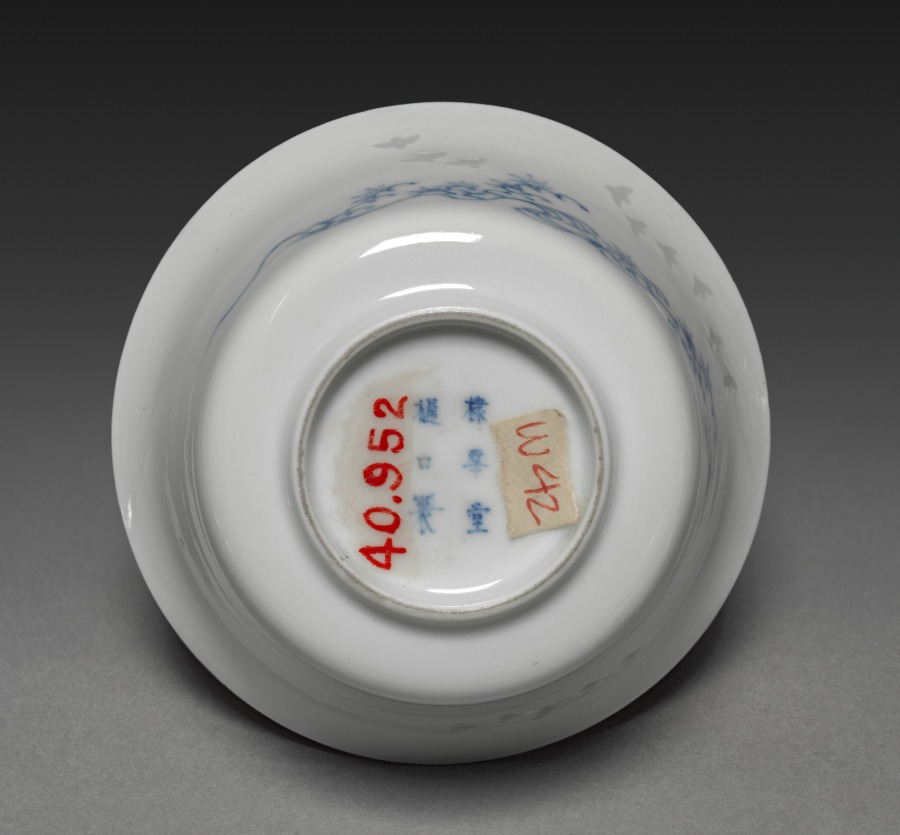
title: Wine Cup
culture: Japan, Edo period (1615–1868)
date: 1700s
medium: porcelain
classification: Ceramic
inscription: inscription in underglaze blue on base.